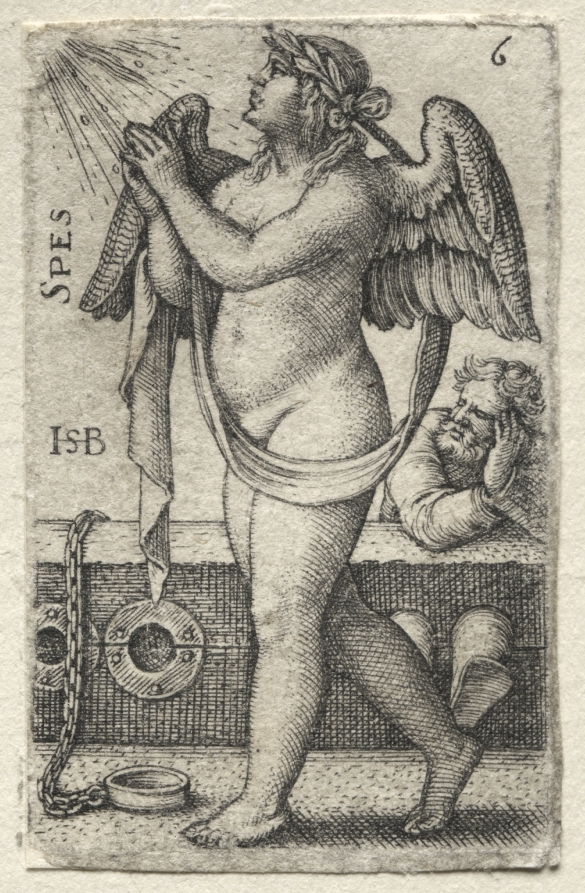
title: The Knowledge of God and the Seven Cardinal Virtues: Hope - Spes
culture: Germany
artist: Hans Sebald Beham (German, 1500–1550)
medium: engraving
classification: Print